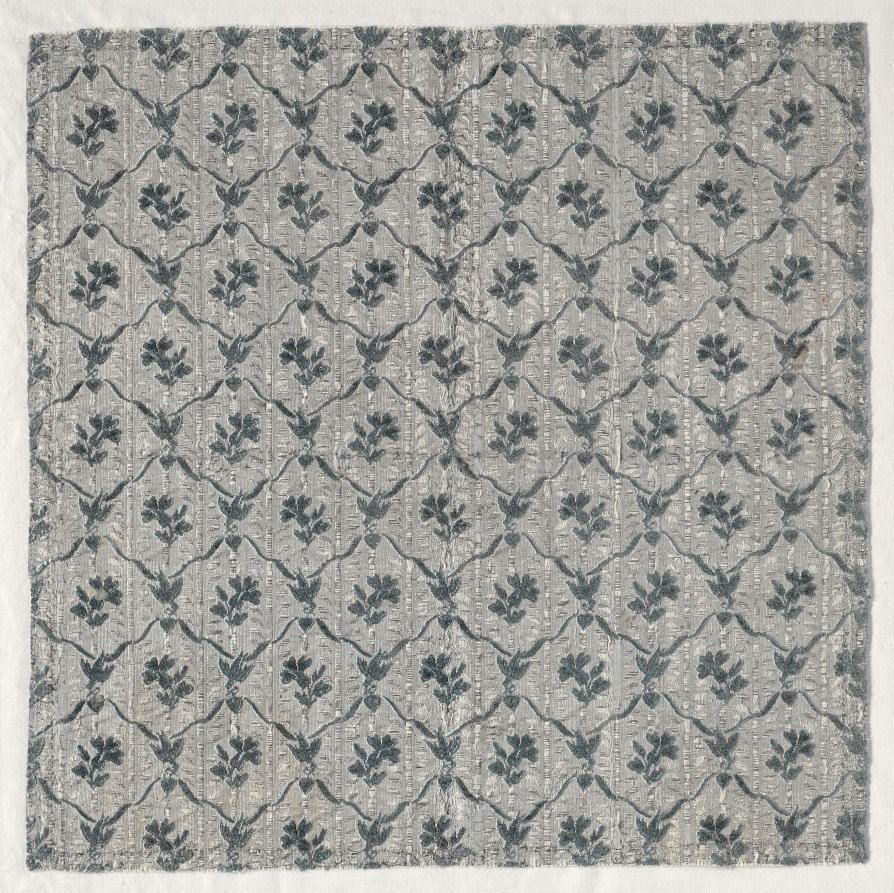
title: Length of Brocaded Silk and Chenille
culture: France, late 18th century, Period of Louis XV (1723-1774)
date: 1723–1774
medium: brocaded silk and chenille on metallic ground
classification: Textile